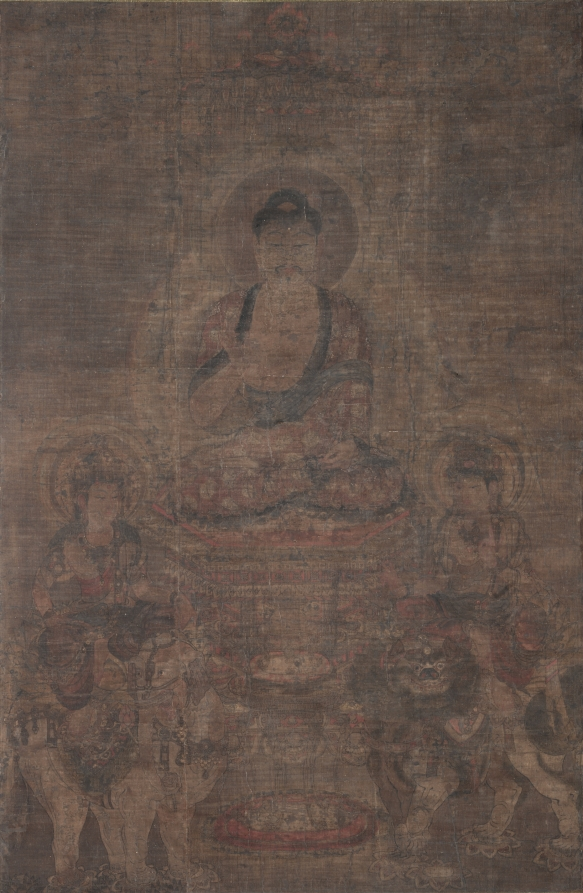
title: Shakyamuni Triad: Buddha Attended by Manjushri and Samantabhadra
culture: China, Tang dynasty (618-907)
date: c. 900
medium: Hanging scroll; ink and color on silk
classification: Painting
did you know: Samantabhadra rides a six-tusked white elephant, while Manjusri is seated upon a lion.